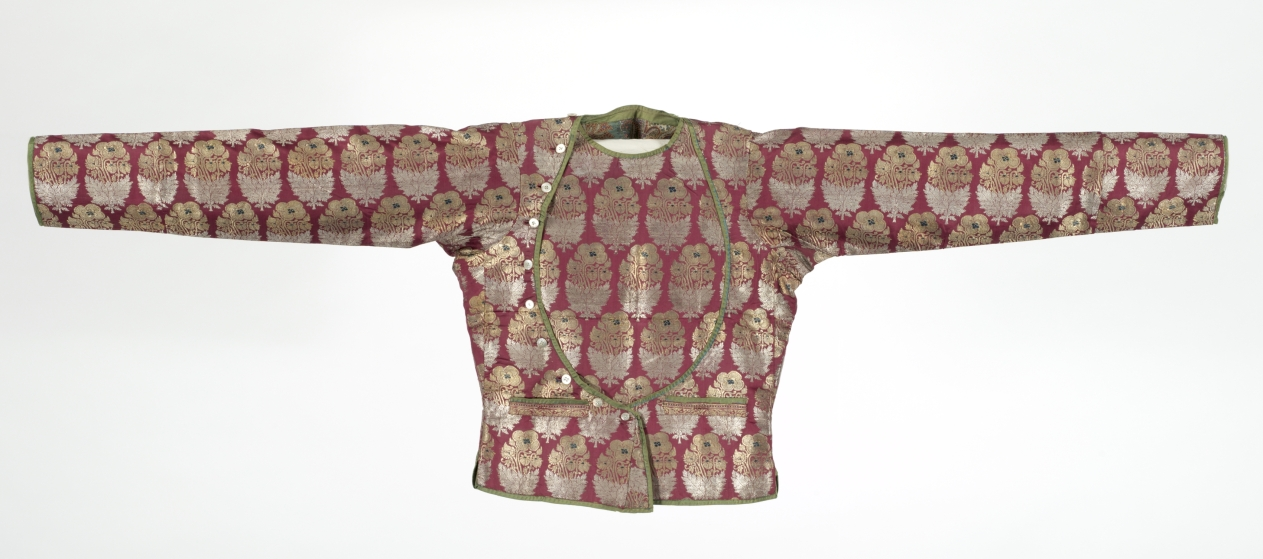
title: Jacket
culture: India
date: 1800s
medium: silk, metal threads, cotton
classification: Garment